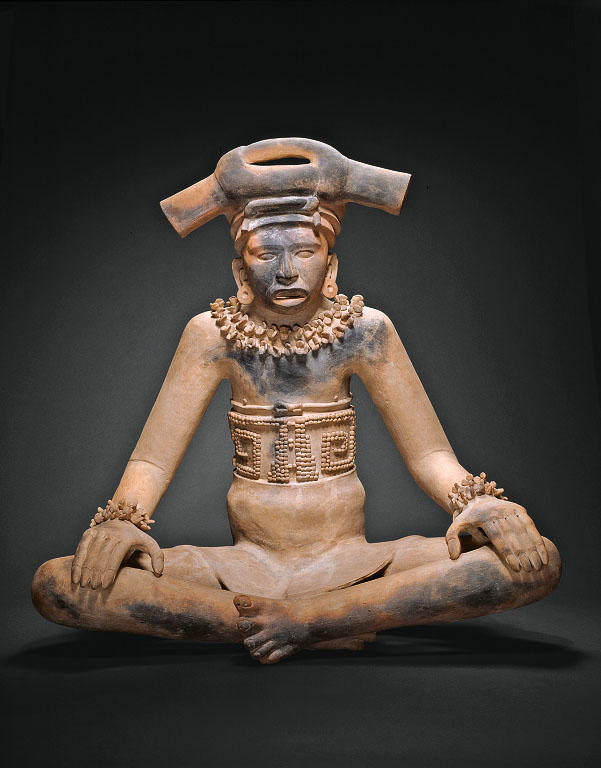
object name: Sculpture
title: Figure of a Seated Leader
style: totonac, early classic, classic, mesoamerican, Pre-Columbian, americas, remojadas, classic veracruz, Arts of the Americas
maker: Totonac, Remojadas; Veracruz, south-central Gulf Coast, Mexico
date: 300–600 CE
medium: Terracotta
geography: Remojadas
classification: ceramics; earthenware; sculpture; art of the americas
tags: people, textile pattern, costume, headdresses, rulership, rulers (people)